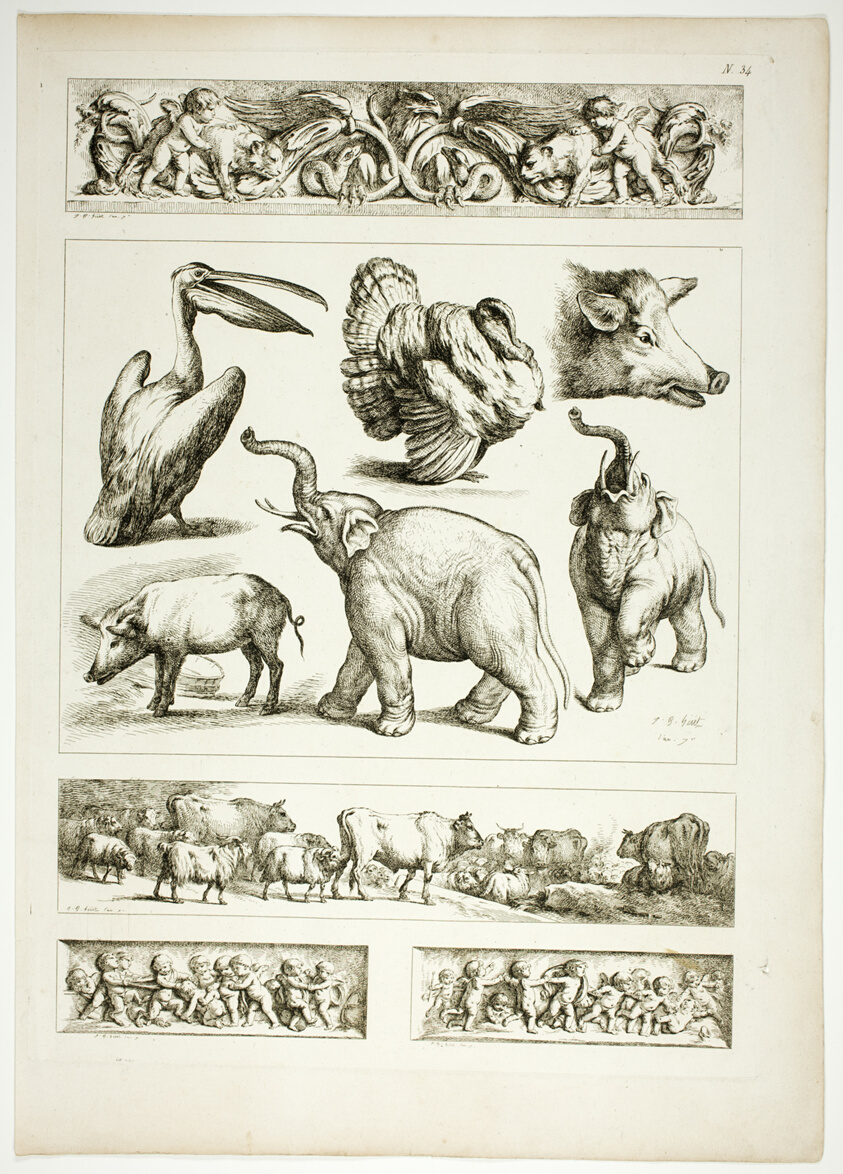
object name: Print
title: Plate 34 of 38 from Oeuvres de J. B. Huet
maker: Jean Baptiste Huet (French, 1745-1811)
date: 1796–99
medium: Etching on paper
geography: France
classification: etching; print; prints and drawing